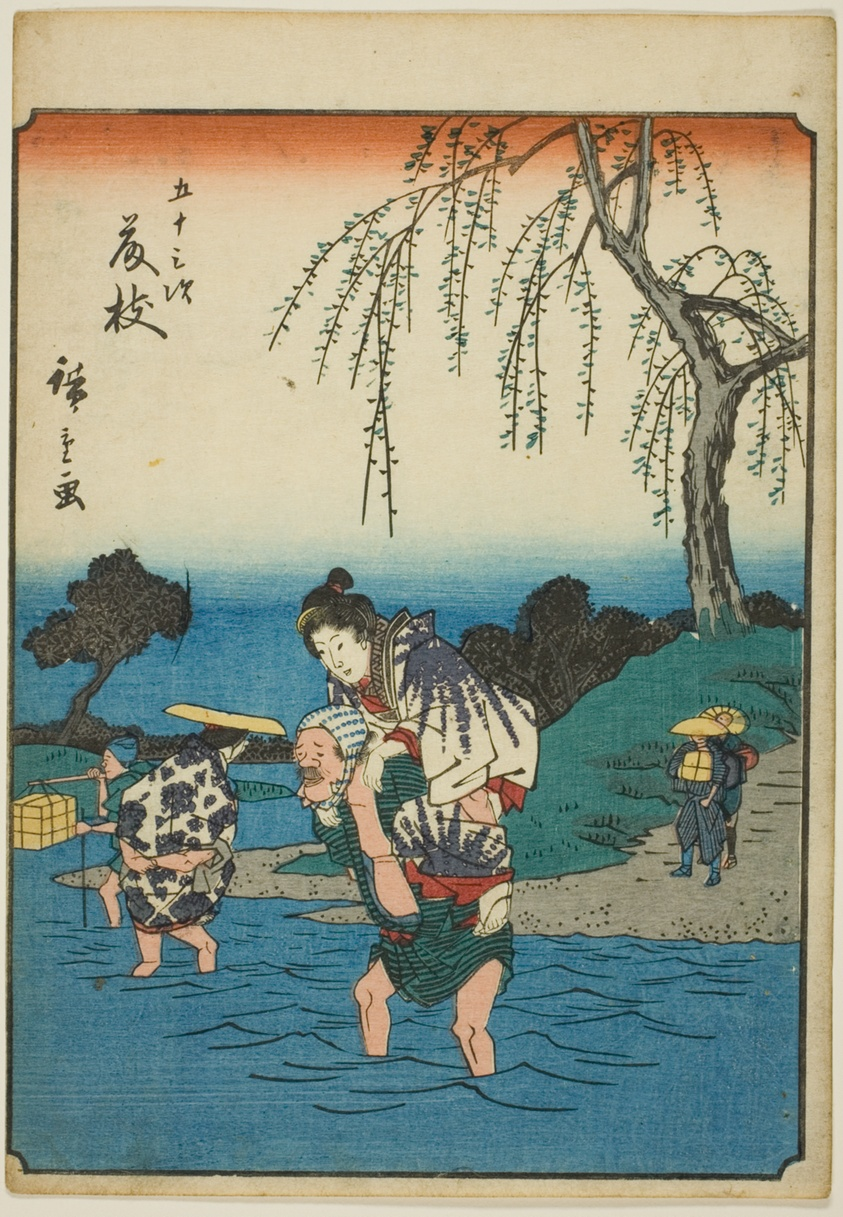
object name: Print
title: Fujieda, from the series "Fifty-three Stations [of the Tokaido] (Gojusan tsugi)," also known as the Figure Tokaido (Jinbutsu Tokaido)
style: Japanese (culture or style)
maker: Utagawa Hiroshige 歌川 広重; Japanese, 1797-1858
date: 1852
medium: Color woodblock print; chuban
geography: Japan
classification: woodblock print; print